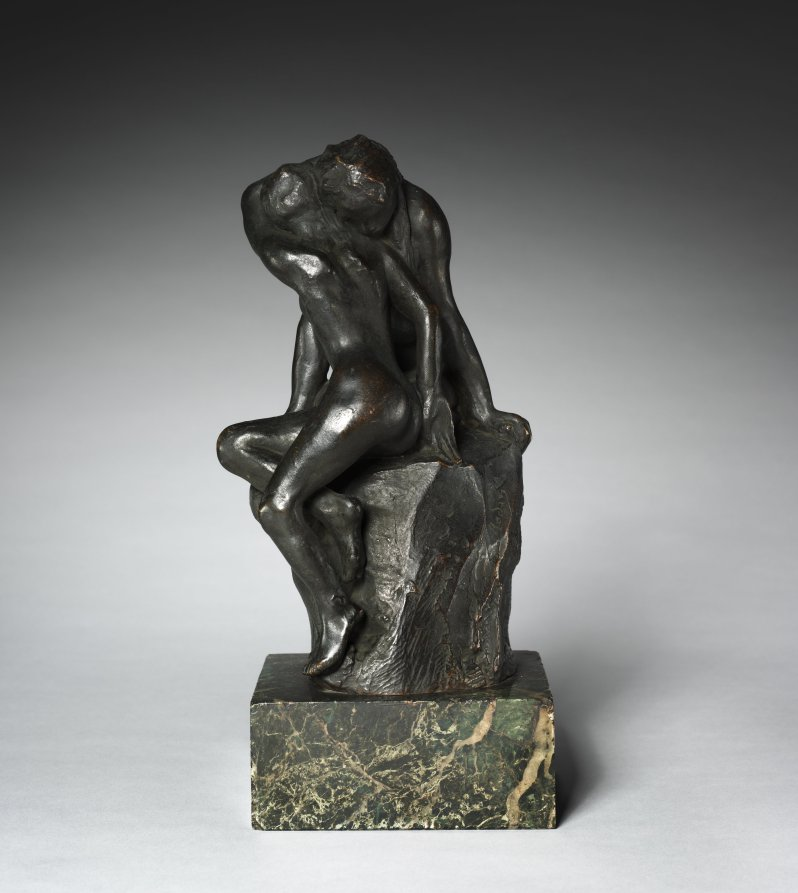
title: Young Girl Confiding Her Secret to Isis (Jeune fille confiant son secret à Isis)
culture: France, 19th century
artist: Auguste Rodin (French, 1840–1917)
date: 1899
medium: bronze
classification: Sculpture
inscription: Inscribed in area below larger figure's left hand and smaller figure's right hand: "Rodin"; below feet of larger figure: "L. Persinka, Fondeur, Versailles"